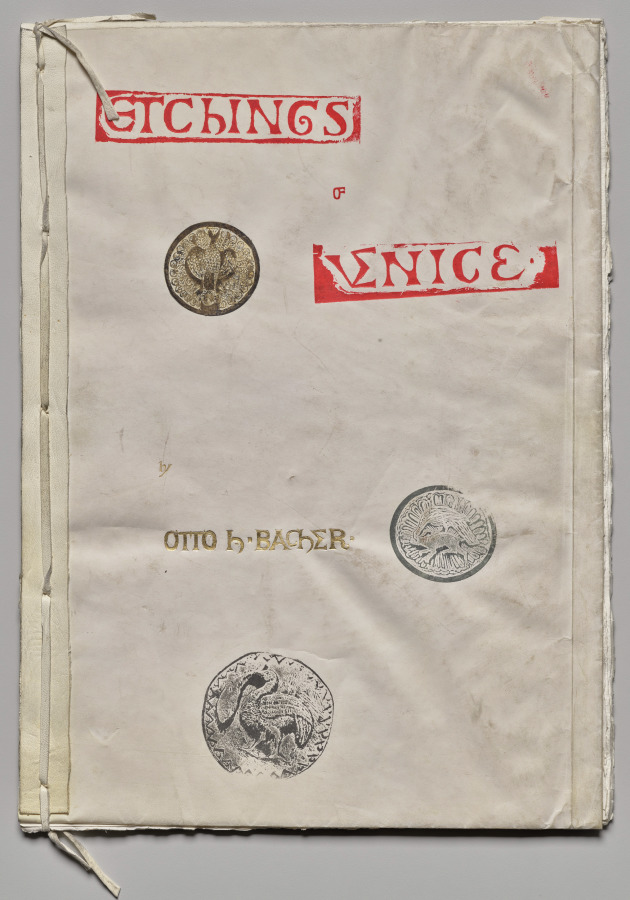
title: Etchings of Venice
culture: America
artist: Otto H. Bacher (American, 1856–1909)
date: 1881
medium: etching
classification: Print